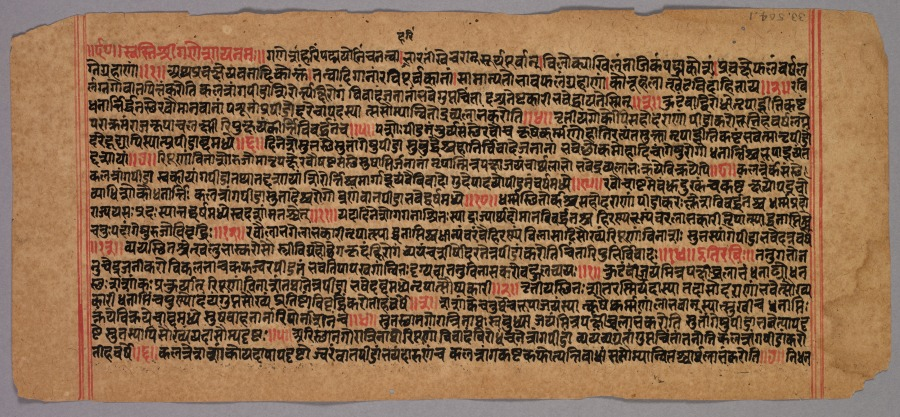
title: Page from a Jaina Manuscript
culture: India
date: 1400s–1500s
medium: ink on paper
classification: Manuscript